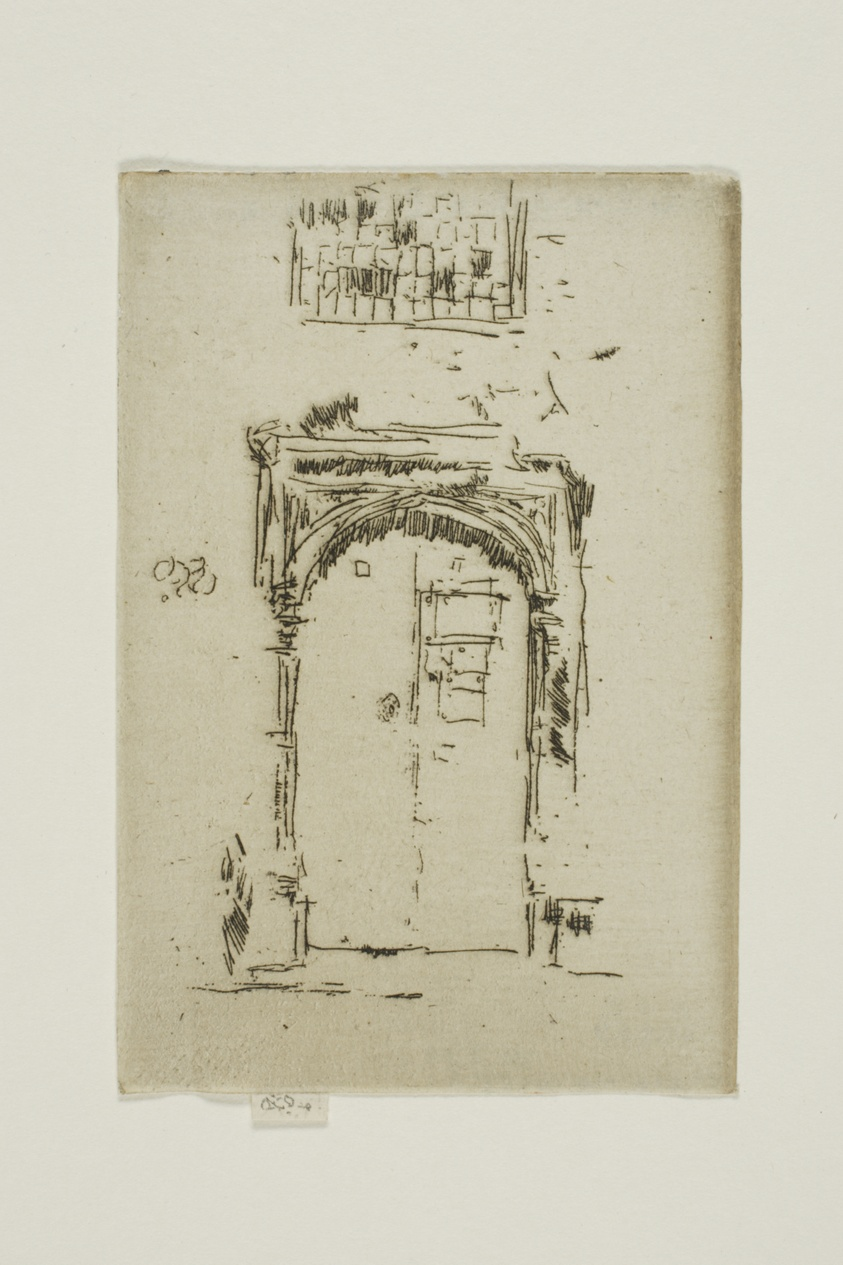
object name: Print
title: Church Doorway, EdgwareImpression: Art Institute of ChicagoArt Institute of Chicago(1924.659)Church Doorway, Edgware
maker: James McNeill Whistler (American, 1834-1903)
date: 1887/1888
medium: Etching in black ink on cream laid paper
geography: United States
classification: etching; print; prints and drawing; paper